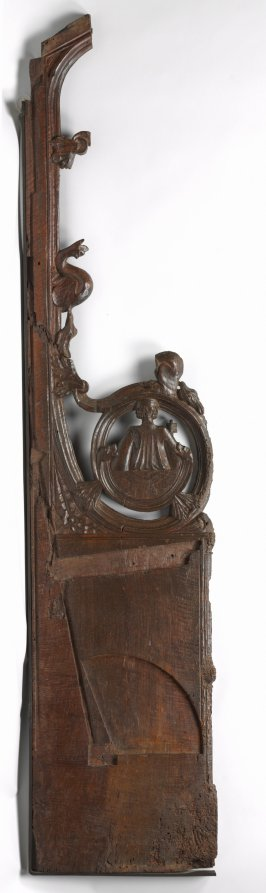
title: Panel from a Choir Stall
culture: Spain, Catalonia, Monastery of Pedralbes, 14th century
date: c. 1330–1340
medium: walnut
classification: Furniture and woodwork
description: The large panel shown here was probably the end panel of a stall that faced another across the choir of a Gothic church. The panel depicts a seated pope, possibly Urban IV, who holds the keys of St. Peter and a book.